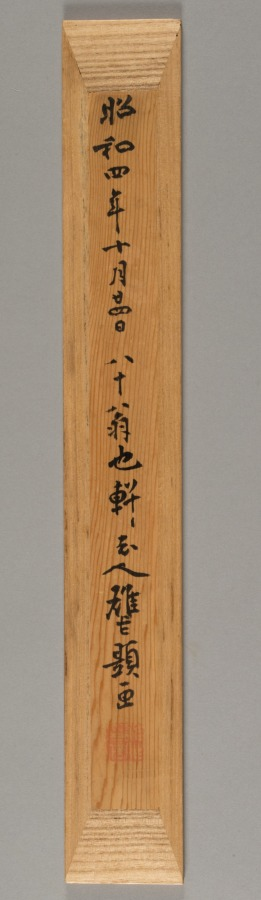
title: Courtesan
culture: Japan, Edo period (1615–1868)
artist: studio of Kaigetsudō Ando (Japanese, c. 1671–1743)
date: 1700s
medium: hanging scroll; ink and color paper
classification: Painting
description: Paintings of the courtesans who provided men with a sophisticated menu of appealing fashions, flattery, witty banter, music, dancing, and sexual services in the Yoshiwara district of the city of Edo (Tokyo) were the bread and butter of the Kaigetsudō studio, in whose style this work is painted. Their paintings emphasized bold, sweeping calligraphic ink lines in rendering the figures’ forms, along with high-contrast colors and patterns in their typically solitary subjects’ garments. Aside from the occasional prop or poem, the space around the dramatic figure was left entirely blank.